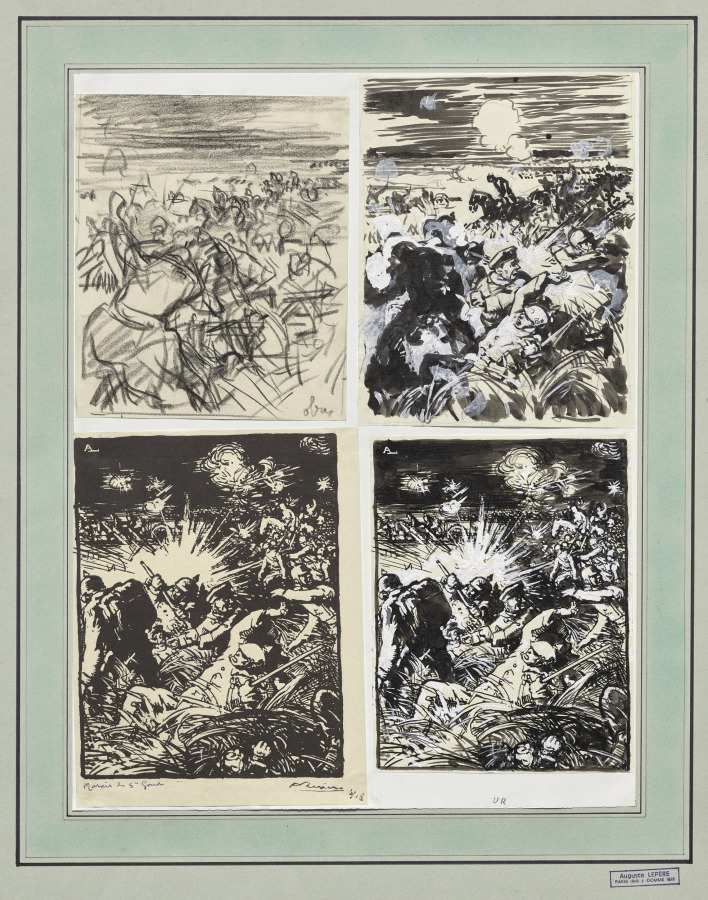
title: Marais de Saint-Gond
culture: France, 20th century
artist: Auguste Louis Lepère (French, 1849–1918)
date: 1914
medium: brush and black ink over pencil with white highlights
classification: Drawing